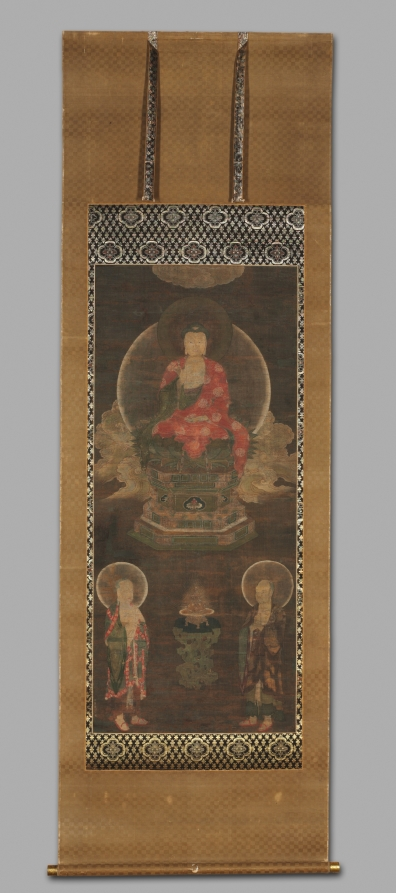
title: Shakyamuni Triad: Buddha Attended by Manjushri and Samantabhadra (Buddha)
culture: China, Fuzhou, Fujian Province, Yuan dynasty (1271-1368)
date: late 1300s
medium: Hanging scroll; ink and color on silk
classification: Painting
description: This triptych is a rare example of Yuan Buddhist painting. It depicts the historic Buddha Shakyamuni flanked by two attending bodhisattvas, Manjushri (the bodhisattva of wisdom, riding a lion) and Samantabhadra (the bodhisattva of universal virtue, riding an elephant). Below them are others seeking enlightenment: two disciples of the Buddha (Ananada and Kasyapa), two non-Chinese people, a boy with topknots, and a female worshiper. The clouds above and around the divine beings form one scene that illustrates Shakyamuni’s sermon from the Lotus Sutra. This text became an important basis for Buddhist faith throughout East Asia and was central to the Mahayana school of Buddhism.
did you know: Shakyamuni is seated cross-legged on the throne with the hand gesture (mudra) of giving instruction.